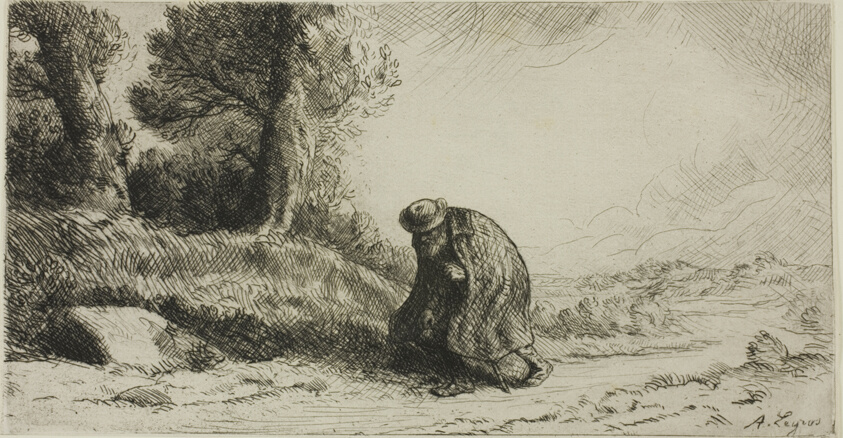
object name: Print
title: A Vagabond Walking Along a Lane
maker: Alphonse Legros (French, 1837-1911)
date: c. 1890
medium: Etching and drypoint on cream laid paper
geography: France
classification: etching; print; prints and drawing